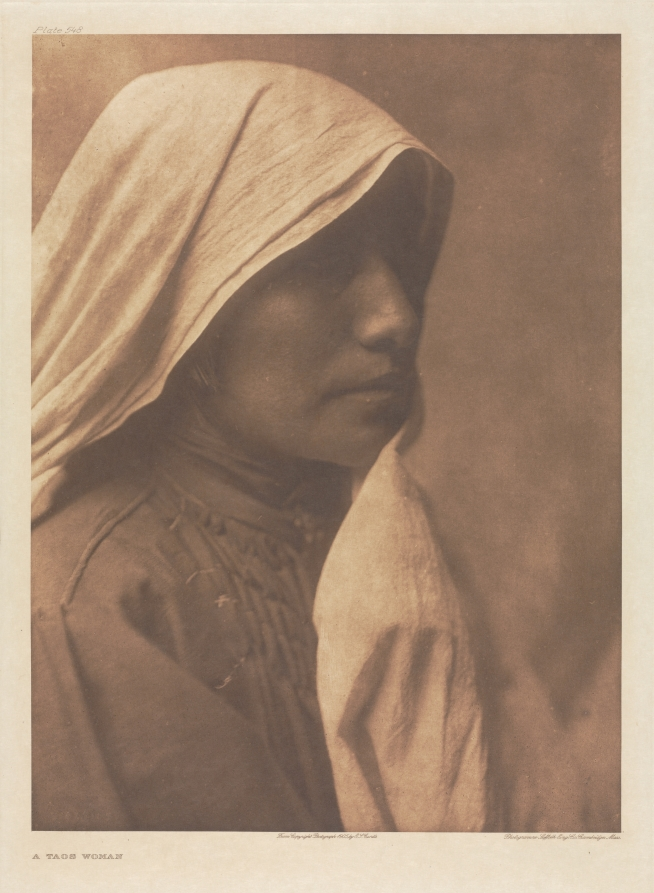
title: Portfolio XVI, Plate 548: A Taos Woman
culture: America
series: The North American Indian: being a series of Portfolios picturing and describing the Indians of the United States, the Dominion of Canada, and Alaska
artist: Edward S. Curtis (American, 1868–1952)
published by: The University Press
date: 1905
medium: photogravure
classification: Portfolio